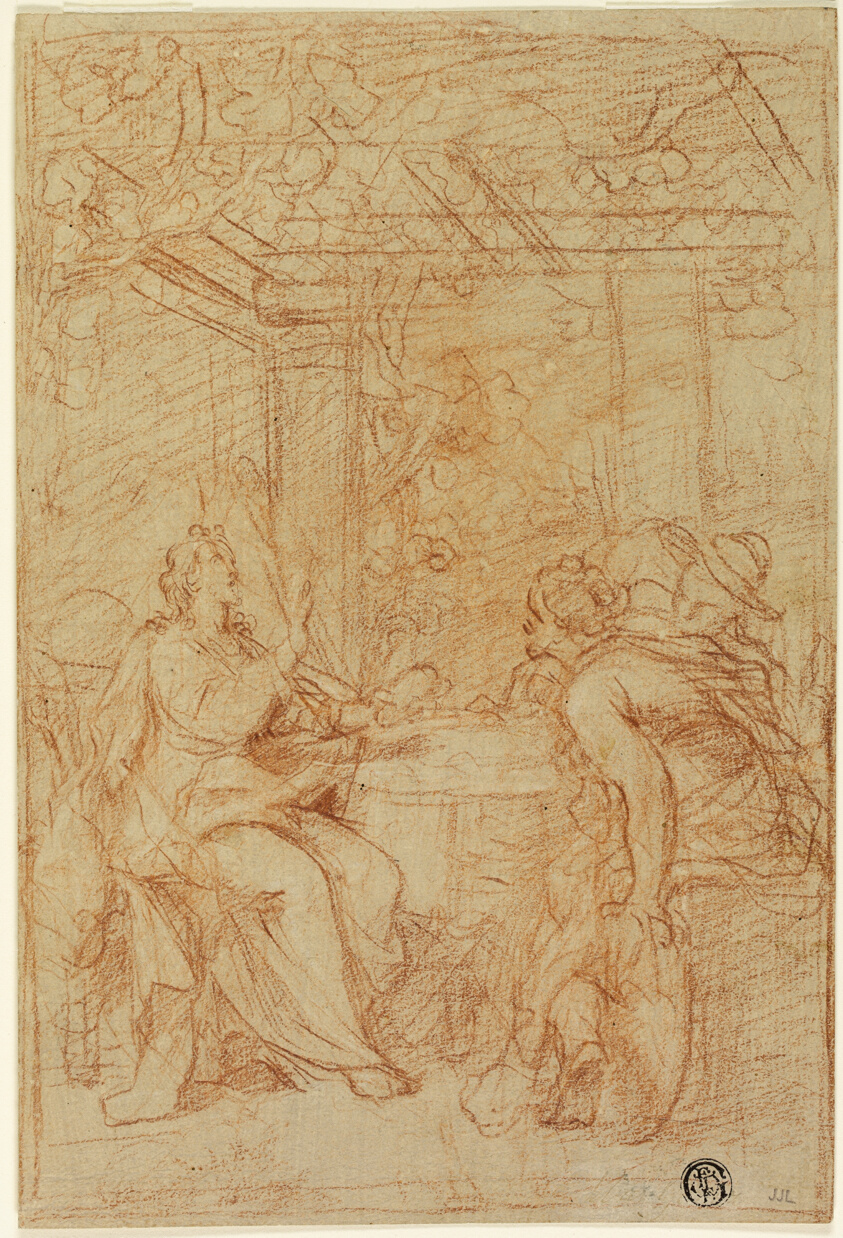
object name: Drawing and Watercolor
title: Supper at Emmaus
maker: Attributed to Nicolas Bertin; French, c. 1667-1736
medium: Red chalk on tan laid paper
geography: France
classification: chalk; drawings (visual works); prints and drawing